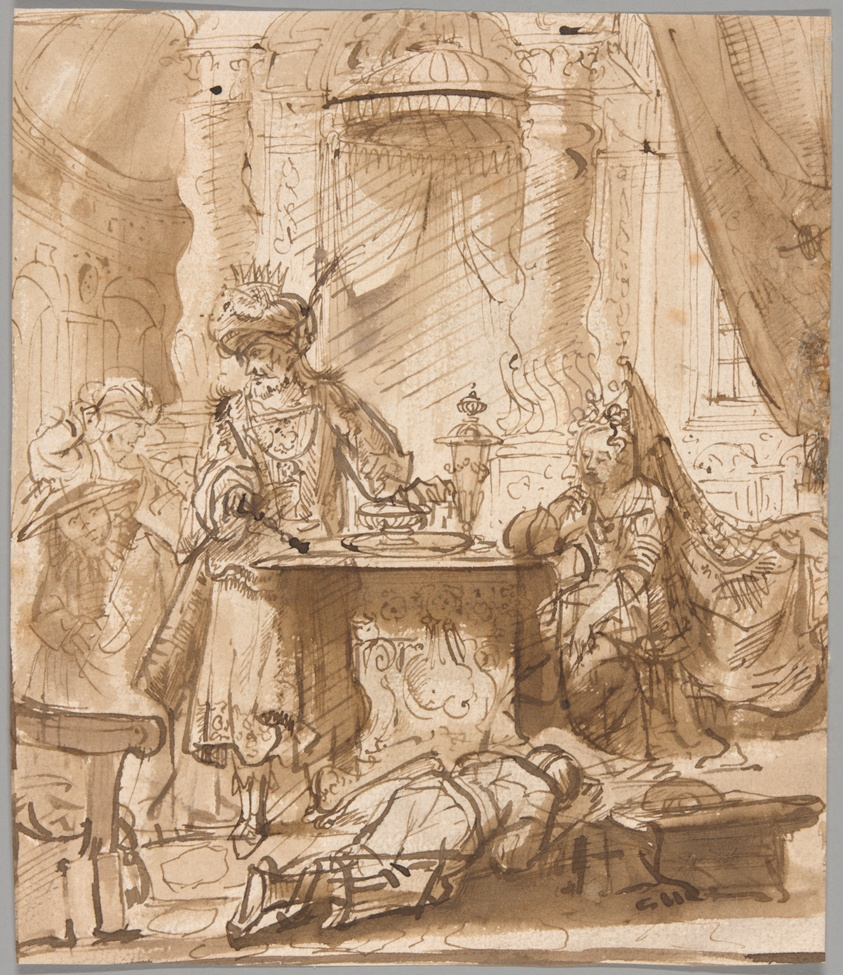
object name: Drawing and Watercolor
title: The Degradation of Haman before Ahasuerus and Esther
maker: School of Rembrandt van Rijn (Dutch, 1606-1669) contemporary with Govert Flinck (Dutch, 1615-1660); with corrections by Rembrandt or a member of Rembrandt workshop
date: 1630s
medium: Pen and brown ink, with brush and brown wash, on cream laid paper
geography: Holland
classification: pen and ink drawings; drawings (visual works); prints and drawing